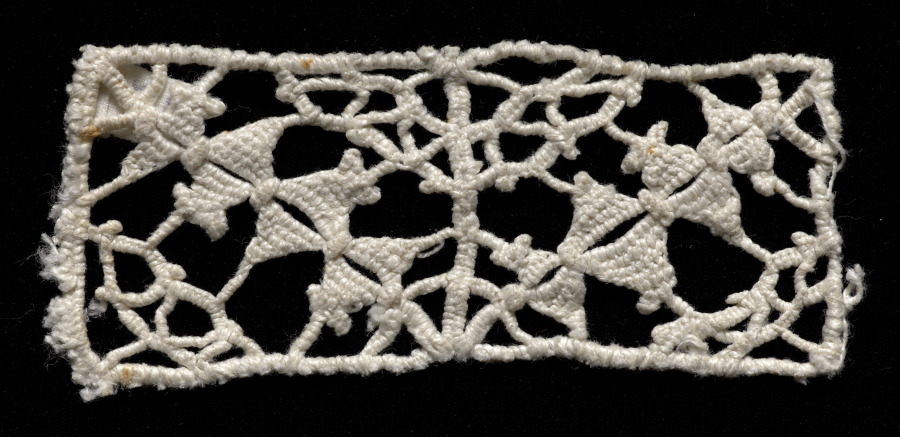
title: Lace Fragment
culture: Italy, 1600s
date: 1600s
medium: Linen: needle lace (reticella) insertion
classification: Lace